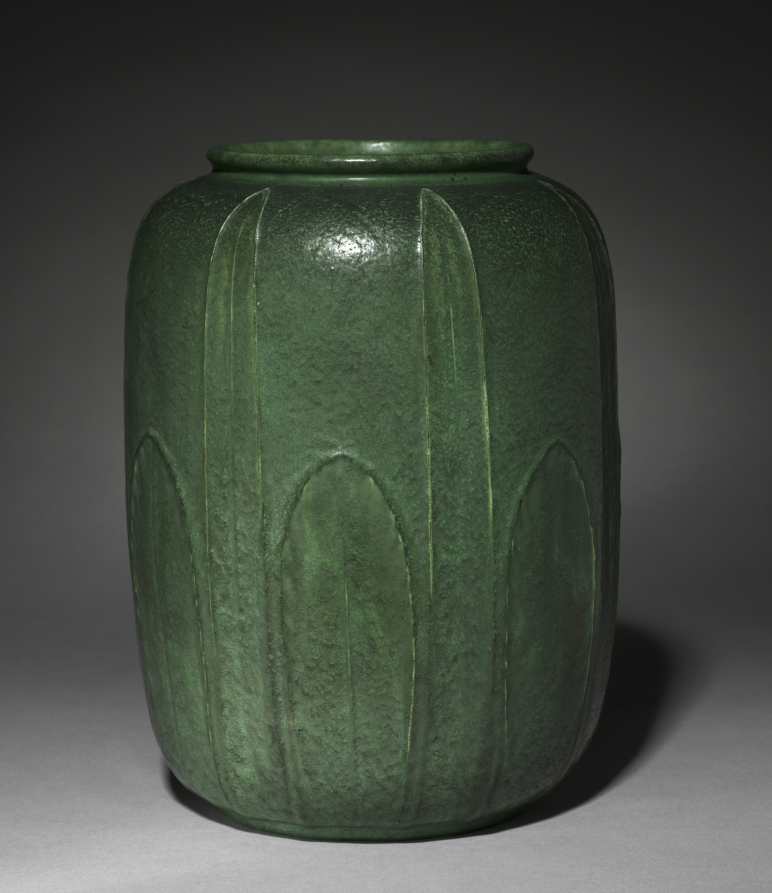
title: Vase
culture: America, early 20th Century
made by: Grueby Pottery Company (American)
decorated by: Wilhelmina Post (American)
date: c. 1900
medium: stoneware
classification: Ceramic